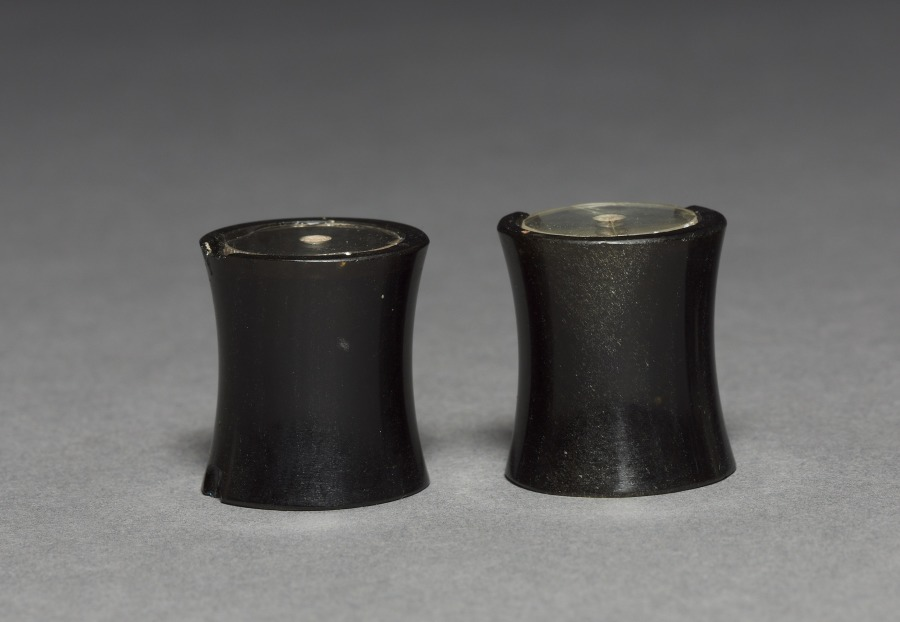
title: Pair of Ear Ornaments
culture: Mexico, Guerrero, Ichcatiopan, Mixtec or Aztec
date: c. 1200–1519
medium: obsidian, crystal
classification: Jewelry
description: This set of ear ornaments, each with a rock crystal insert, is said to have been found with a pendant made of jade and gold (1983.190). They may come from a buried offering or the tomb of an Aztec noble.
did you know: These obsidian ear ornaments look black but have a golden sheen.